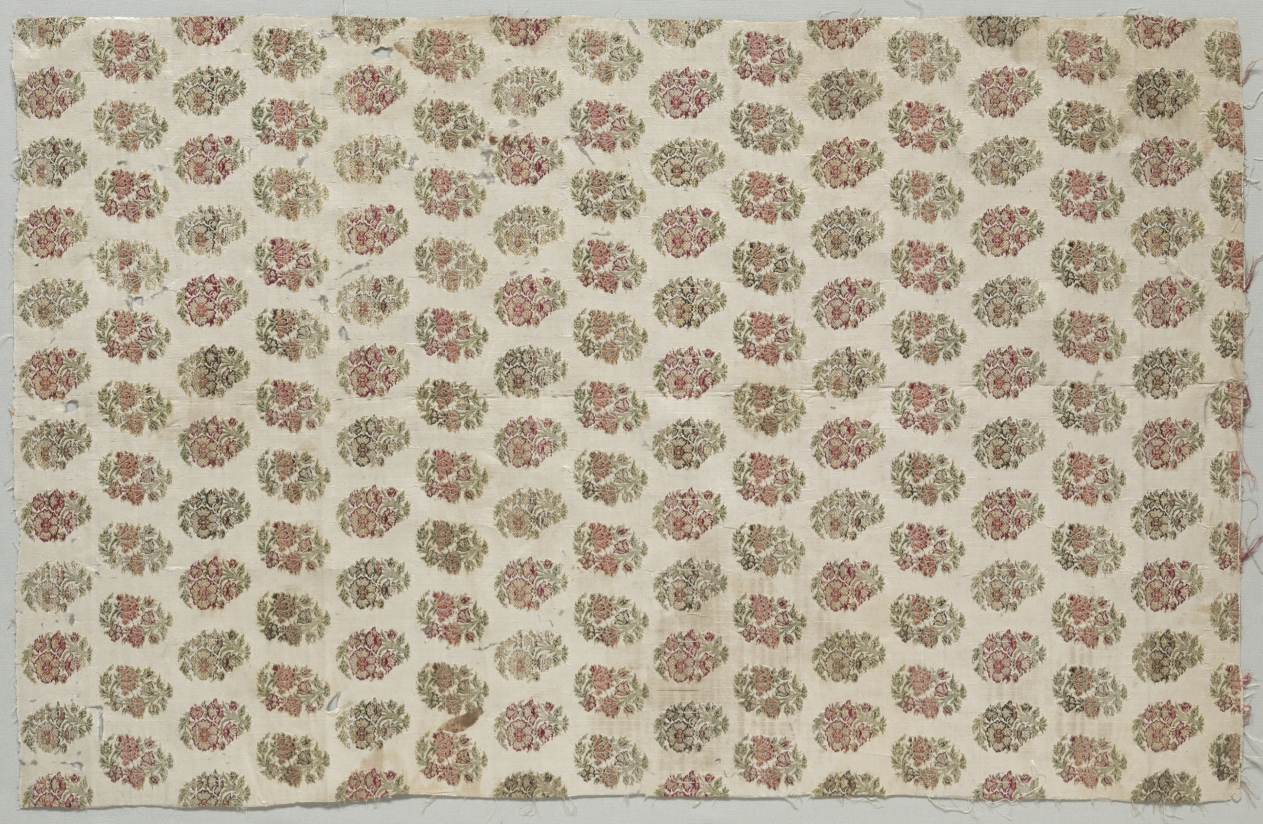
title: Brocade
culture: Iran, 18th century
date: 1700s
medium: silk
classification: Textile